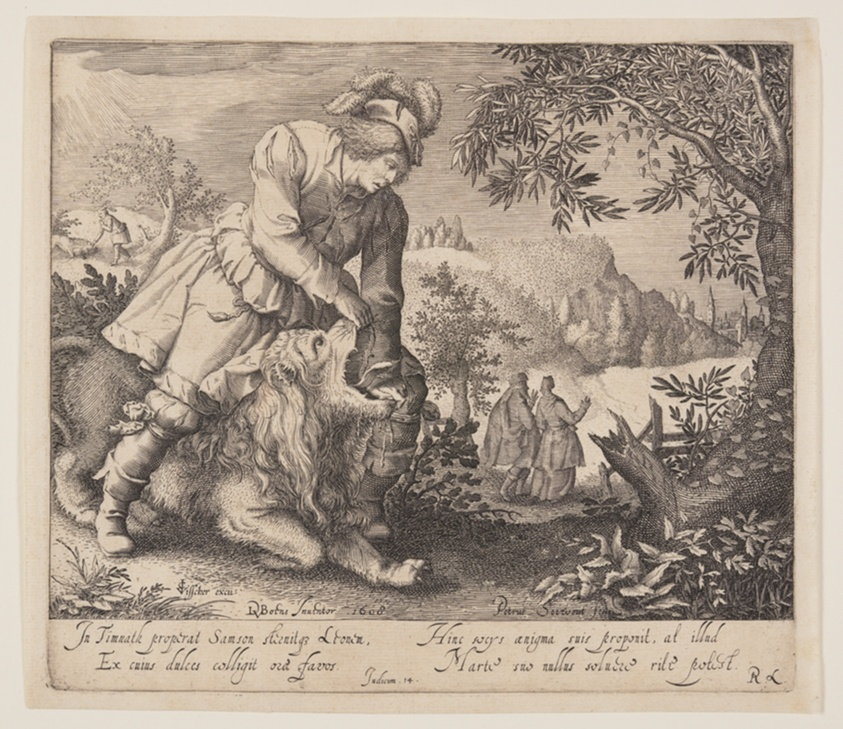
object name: Print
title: Samson and the Lion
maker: Pieter Serwouters (Flemish, 1586–1657); after David Vinckboons (Flemish, 1576-1632)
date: 1609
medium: Engraving on ivory laid paper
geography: Flanders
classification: print; paper; prints and drawing; engraving